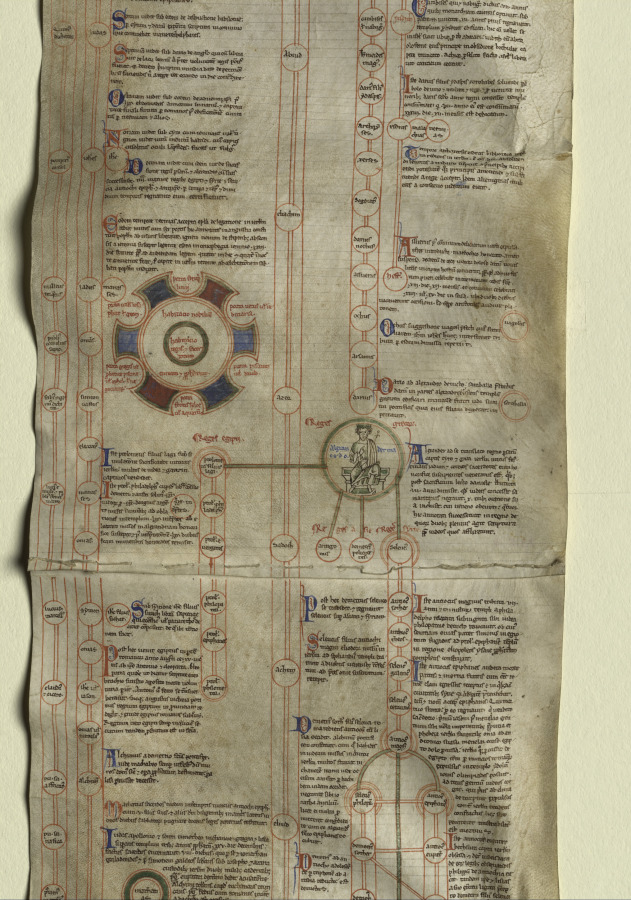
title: Peter of Poitiers's "Compendium Historiae in Genealogia Christi"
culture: England, Canterbury, 13th century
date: c. 1220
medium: ink and tempera on a vellum roll of four membranes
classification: Manuscript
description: This manuscript roll, composed of four membranes formerly stitched together in a continuous roll about nine feet long, has been divided in the middle for easier visibility and study. The text is an abridgment of biblical history focused on the descent of Christ from Adam. It was written by Peter of Poitiers (about 1130–1205), who taught theology and history in Paris and was widely copied. The present roll is an English copy of Peter's text made shortly after his death. Although manuscript rolls were hung on the walls of a classroom as instructional aids to students, some of them have value beyond their textual and historical interest because of the fine quality of their drawings, as seen here. A comparison with Canterbury manuscripts and stained glass of around 1220 is the basis for the attribution to Canterbury. Peter of Poitiers's aim in this project was to assist students prevented from mastering biblical history because of its length and because they were too poor to own books. His text on roll is the briefest possible summary of biblical history. It is arranged in six historical stages, denoting the six ages of the world, as decreed by theological tradition. The first five ages were inaugurated by Old Testament individuals: Adam, Noah, Abraham, David, and Sedecias. The birth of Christ heralded the sixth stage. Beginning at the top of the first membrane, the text consists of brief biographical entries on the ancestors of Christ (Adam, Noah, Abraham, Moses, and David) and other biblical personalities. These extend to the birth of Christ on the fourth membrane, ending with accounts of Hebrew and Roman kings and the Apostles. Each compendium shows the names of the ancestors inscribed within circles, those of direct descent placed vertically in a central column, others scattered in clusters to the right and left. The decoration of the roll consists of a series of medallions of diverse geometrical frames filled with either a figural drawing or a diagram. The style of these pen-and-ink drawings, some illuminated in tempera or tinted with wash, stems from English manuscript and glass painting attributed to the school of Canterbury Cathedral. The style of the museum's illustrations is so close to the stained glass panels made for Trinity Chapel at Canterbury (about 1220) to suggest that an artist active as a glazier in the Cathedral workshop may also have executed the manuscript. In the least, the painter of the roll manuscript was familiar with the style of the painted glass, and on this basis, a date of about 1220 seems appropriate. Additional evidence is supplied by a psalter illuminated at Canterbury shortly before 1220. The figurative scenes in this psalter were apparently illustrated by the same hand that executed the line and wash drawings in the museum's roll.